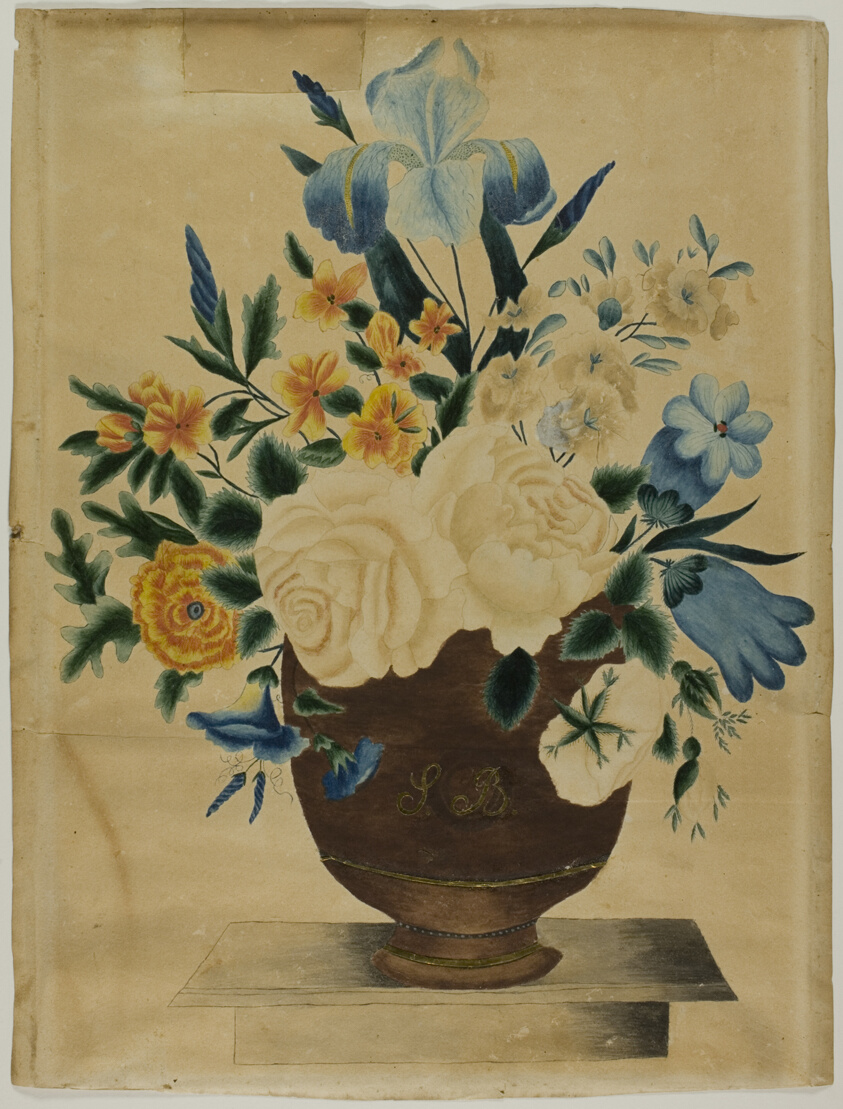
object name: Drawing and Watercolor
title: Still Life with Flower Arrangement in Pot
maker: Unknown Artist; American, 19th century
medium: Watercolor over graphite, with gold paper additions, on cream wove paper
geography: United States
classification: watercolor; drawings (visual works); prints and drawing